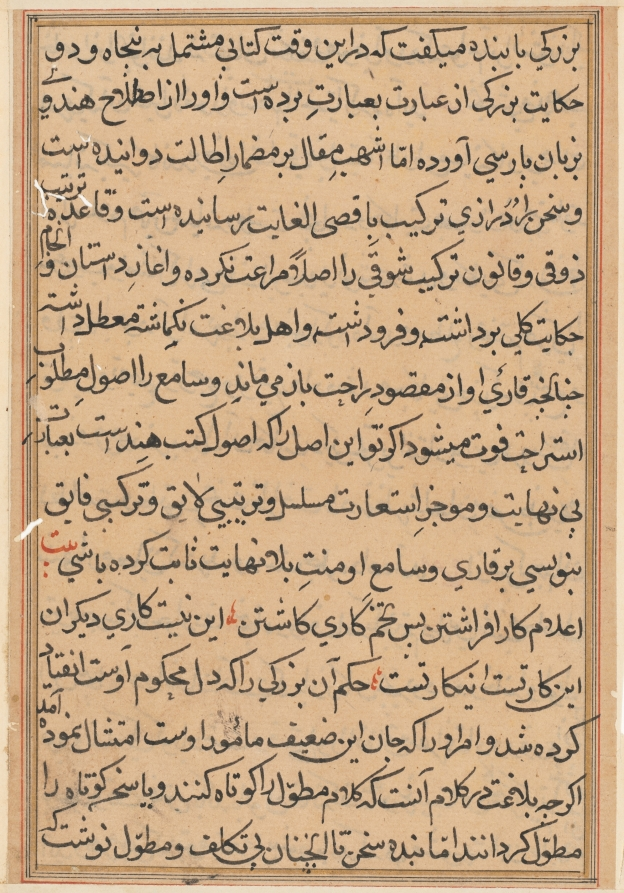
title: Page from Tales of a Parrot (Tuti-nama): text page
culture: Mughal India, court of Akbar (reigned 1556–1605)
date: c. 1560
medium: gum tempera, ink, and gold on paper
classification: Painting